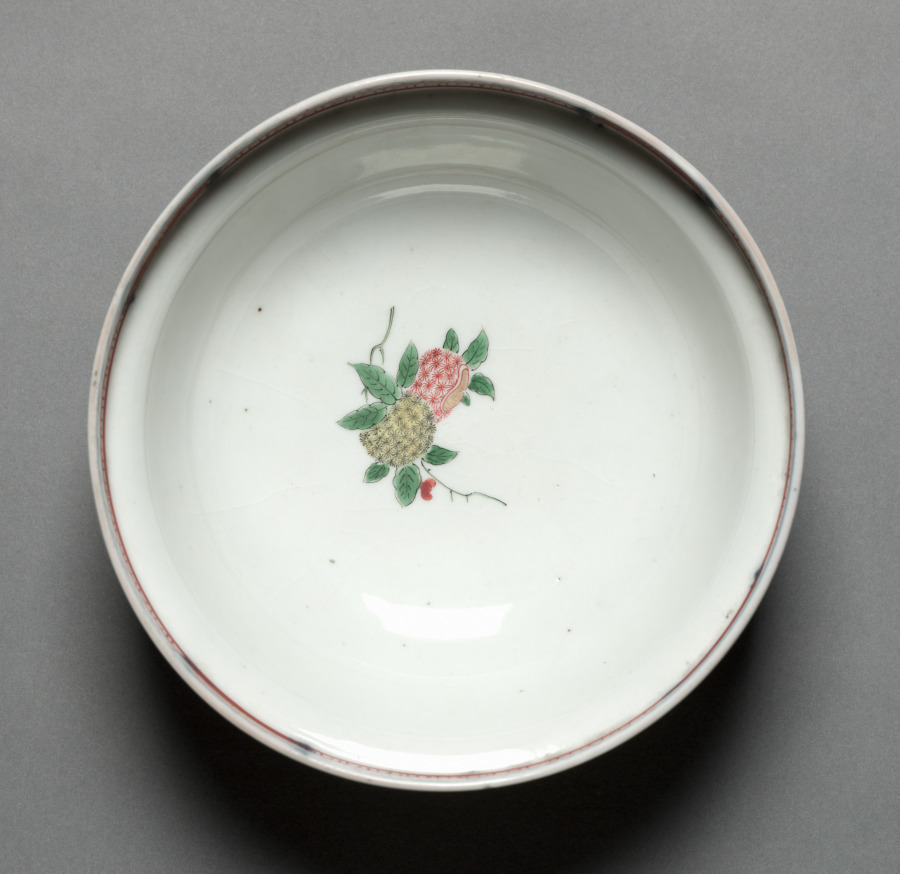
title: Covered Bowl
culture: Japan, Edo period (1615–1868)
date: early to mid-1800s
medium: white porcelain with underglaze blue, overglaze enamel, and gold decoration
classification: Ceramic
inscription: four characters in blue circle on base, translate as: "Wealth Long Spring."